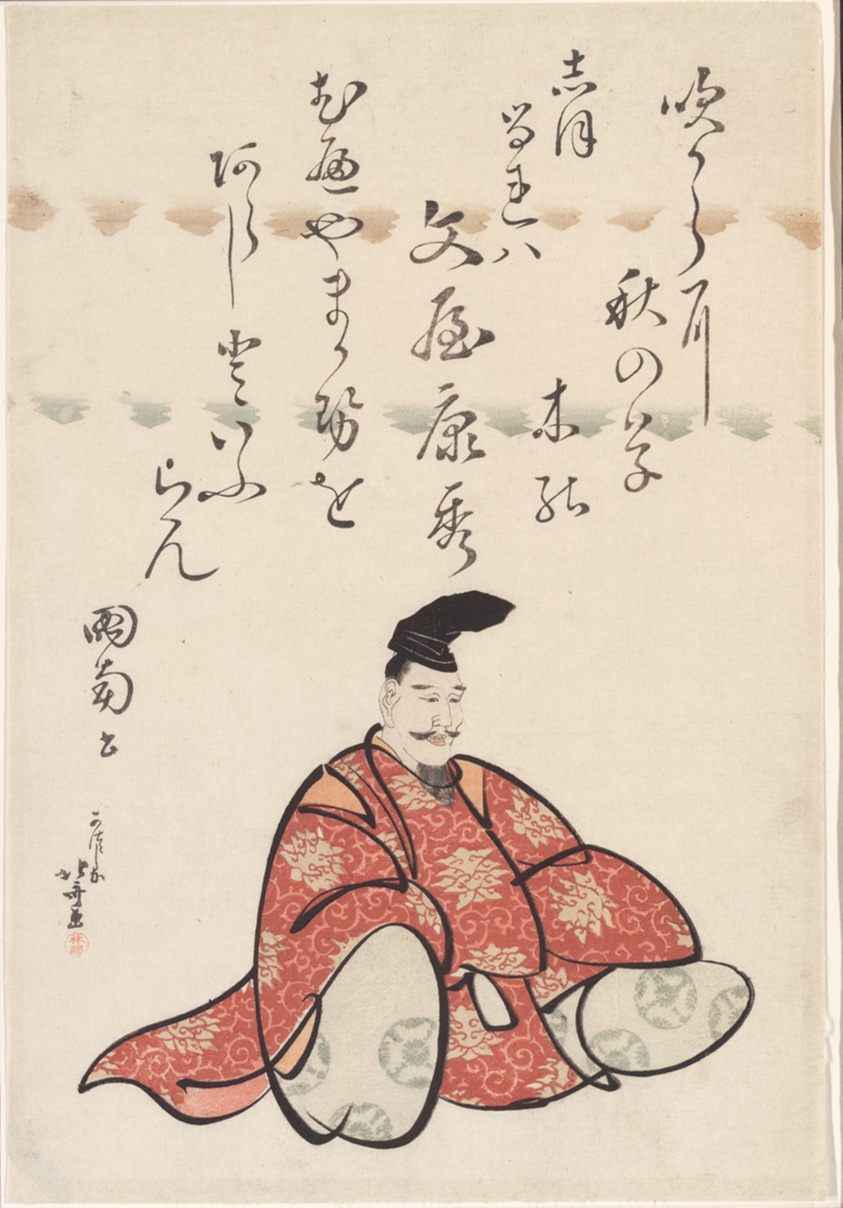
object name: Print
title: The Poet Bunya no Yasuhide, from the series Six Immortal Poets (Rokkasen)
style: Japanese (culture or style)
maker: Katsushika Hokusai 葛飾 北斎; Japanese, 1760-1849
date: c. 1810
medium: Color woodblock print; oban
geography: Japan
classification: print; asian art